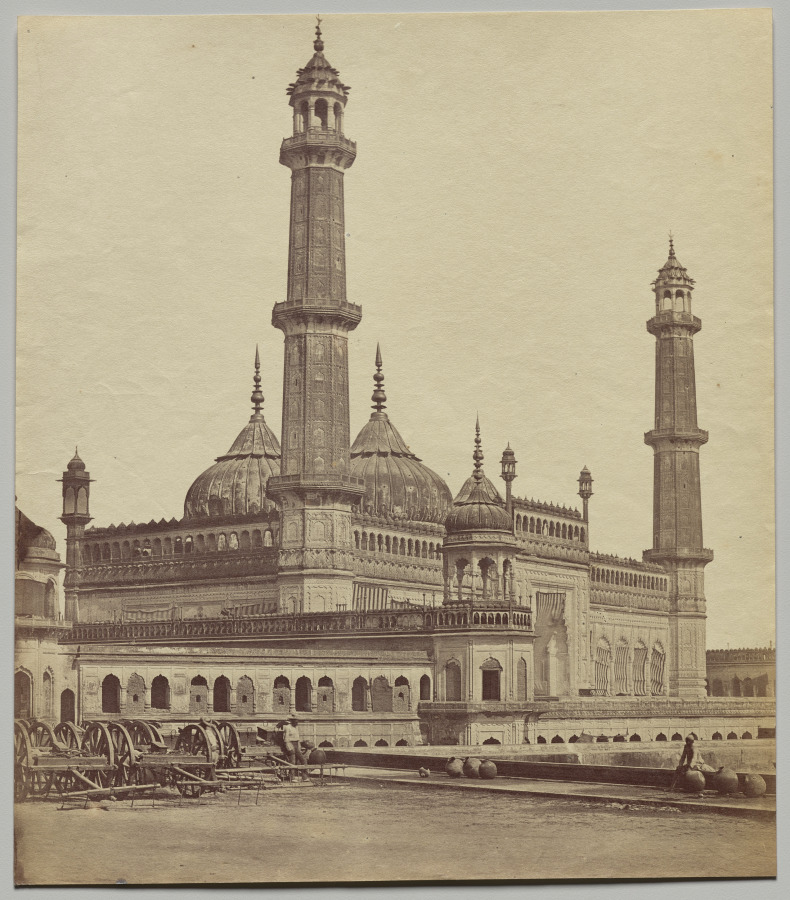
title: Mosque, Inside Asaf-ud-Daula's Imambara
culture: England, 19th century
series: Lucknow After the Siege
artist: Felice A. Beato (British, 1832–1909)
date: 1858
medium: albumen print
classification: Photograph